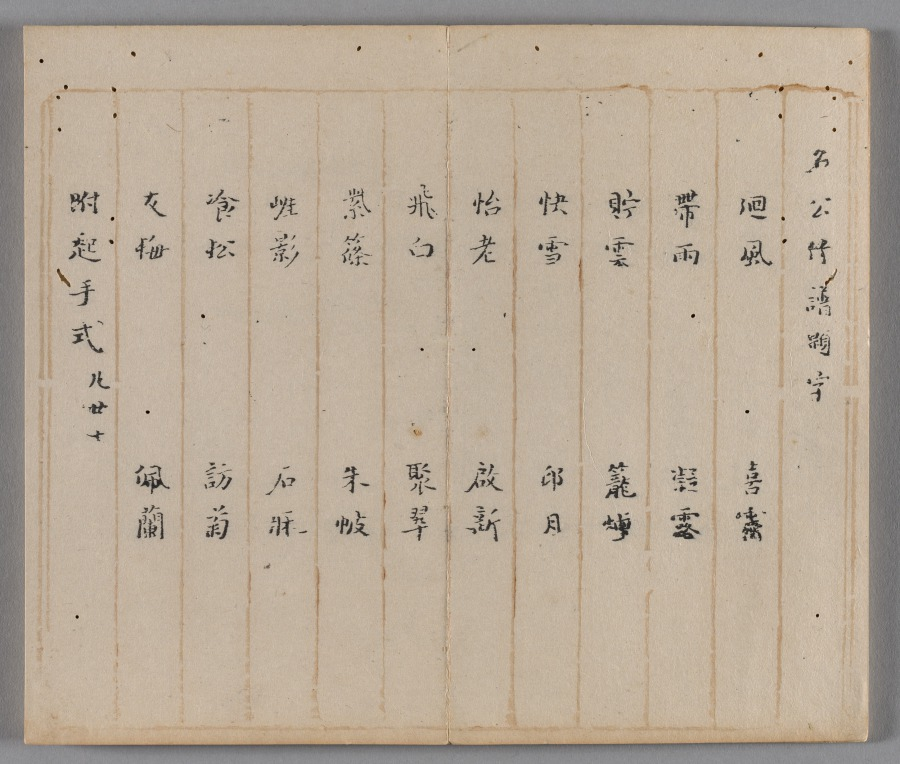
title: Ten Bamboo Studio Painting and Calligraphy Handbook (Shizhuzhai shuhua pu): Bamboo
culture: China, Qing dynasty (1644-1911)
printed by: Hu Zhengyan (Chinese, c. 1584–1674)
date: 1633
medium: Woodblock-printed book; ink and colors on paper; first edition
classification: Print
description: Color printing reached a level of perfection in the early 1600s, as seen in this Ten Bamboo Studio Collection of Calligraphy and Painting and the Mustard Seed Garden Manual of Painting (printed 1679 and 1701). The painterly quality, precision in registering (aligning) the woodblocks, and harmonious colors made them the most successful color print editions in Chinese history. Both editions were printed and compiled in Nanjing, spread nationwide, and had a great impact on the arts in Japan and Korea.